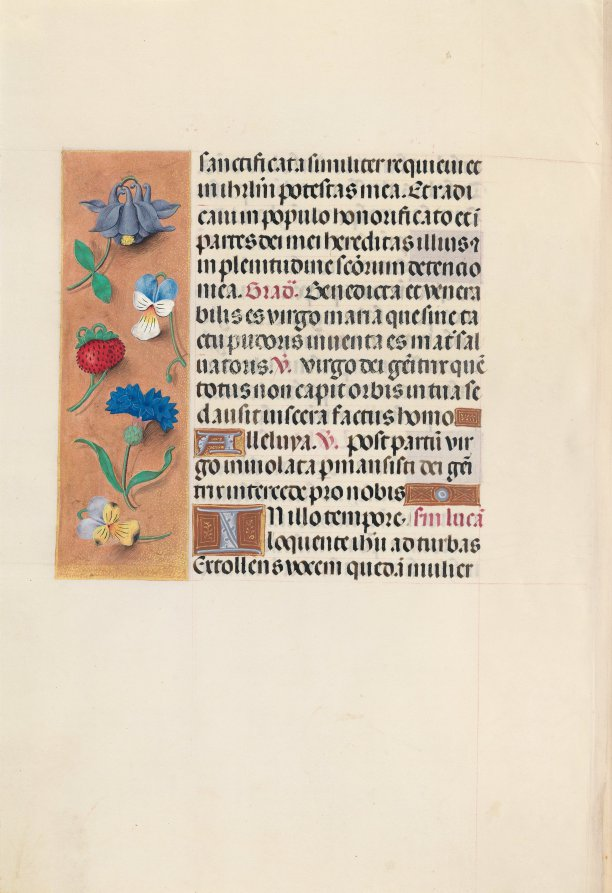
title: Hours of Queen Isabella the Catholic, Queen of Spain: Fol. 90v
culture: Flanders, Ghent and Bruges, late 15th century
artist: Master of the First Prayerbook of Maximillian (Flemish, c. 1444–1519)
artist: and Associates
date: c. 1500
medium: ink, tempera, and gold on vellum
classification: Bound Volume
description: This manuscript was illuminated by a circle of at least five highly organized manuscript painters active in the Flemish cities of Ghent and Bruges. The principal illuminator was Alexander Bening, who painted the majority of the book's miniatures. Manuscripts produced by this circle of artists are renowned for the decoration of their borders, which typically feature a rich variety of realistically-painted flowers, birds, and butterflies. This prayer book, called a book of hours, was intended not for a cleric, but for the private devotions of a lay person-in this case, Isabella the Catholic, Queen of Spain (1451-1504). Isabella's coat of arms embellishes the book's frontispiece. It is unlikely that the book was commissioned by the Queen herself; rather, she probably received it as a diplomatic gift from someone courting her patronage, perhaps Cardinal Francisco Jimenez de Cisneros. A Franciscan friar, Jimenez was dependent upon Isabella for his advancement, first to the post of Queen's confessor in 1492, and then to Archbishop of Toledo in 1495.